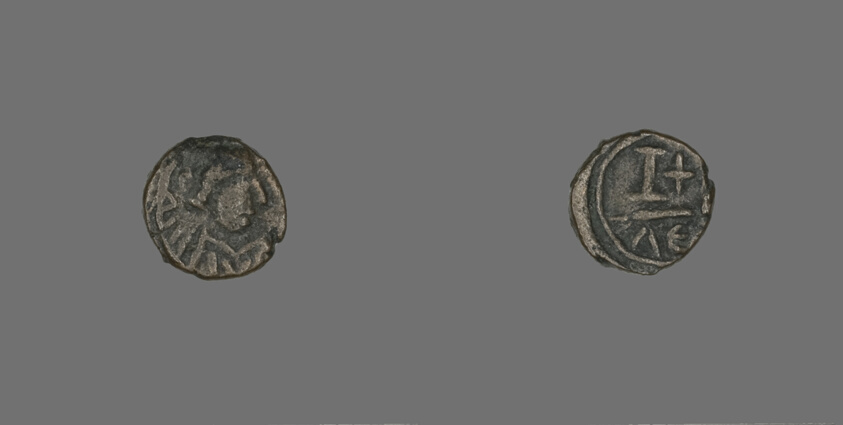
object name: Coin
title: 12 Nummi (Coin) of a Byzantine Emperor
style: byzantine, european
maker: Byzantine, minted in Alexandria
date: Roman Period, 6th century CE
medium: Bronze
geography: Byzantine Empire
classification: coin; ancient art